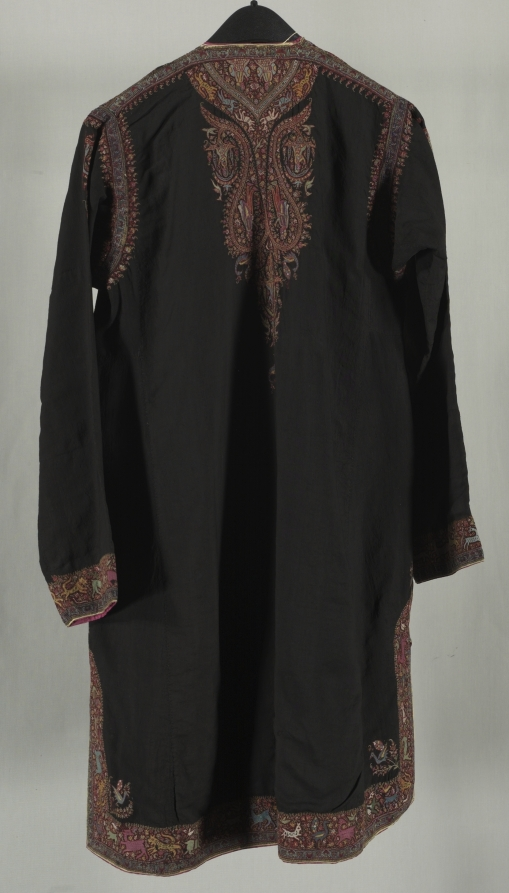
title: Jacket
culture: India, Kashmir, Late 19th century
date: c. 1875–1900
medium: black wool with embroidery, green silk lining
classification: Garment